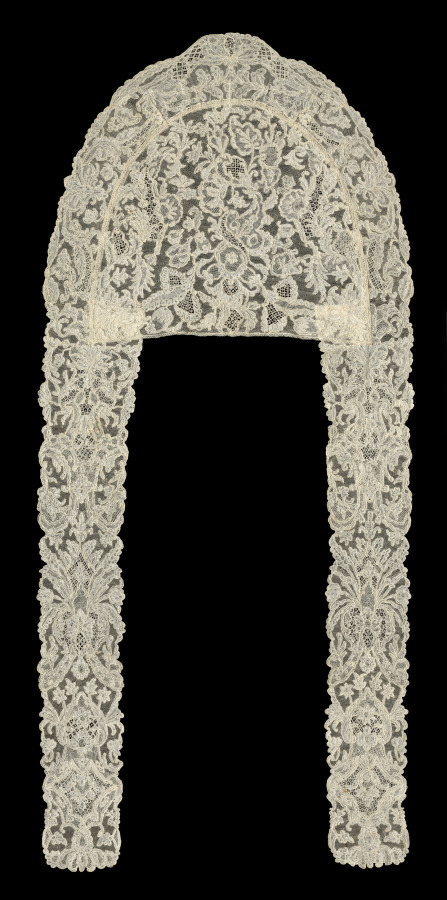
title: Garniture for Cap with Lappets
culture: France, Alençon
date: 1730s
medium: Linen: needle lace (Point d'Alençon)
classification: Lace